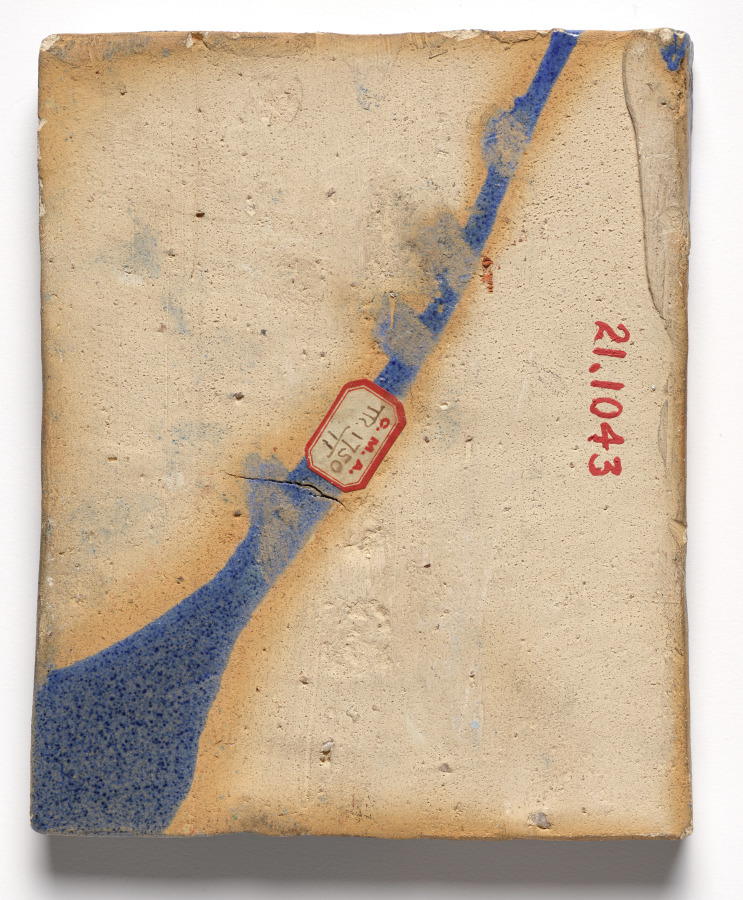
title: Tile- Antelope in Foliage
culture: America, Pennsylvania, Doylestown, Early 20th century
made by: Moravian Pottery and Tile Works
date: before 1921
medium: glazed ceramic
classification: Ceramic